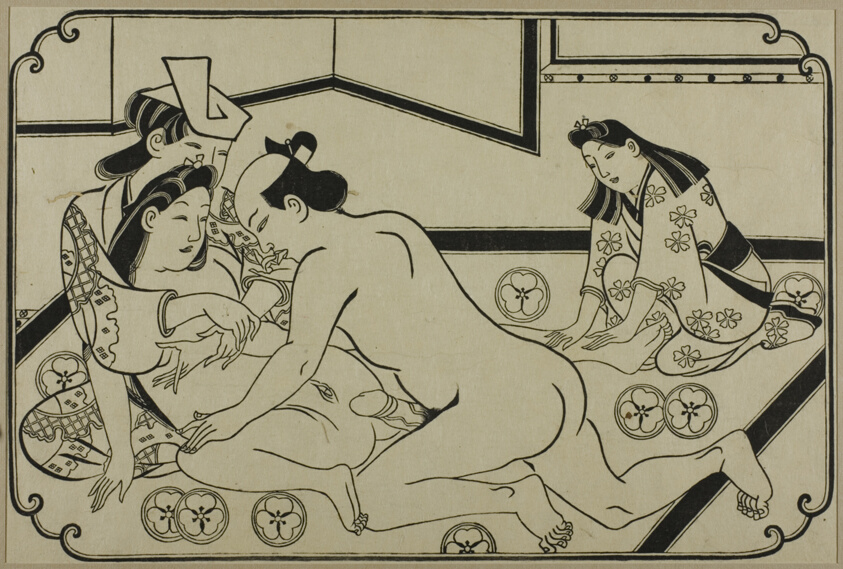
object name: Print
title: A sheet from a shunga album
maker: Hishikawa Moronobu (Japanese, d.1694)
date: 1680s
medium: Woodblock print; sumizuri-e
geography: Japan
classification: woodblock print; print; asian art